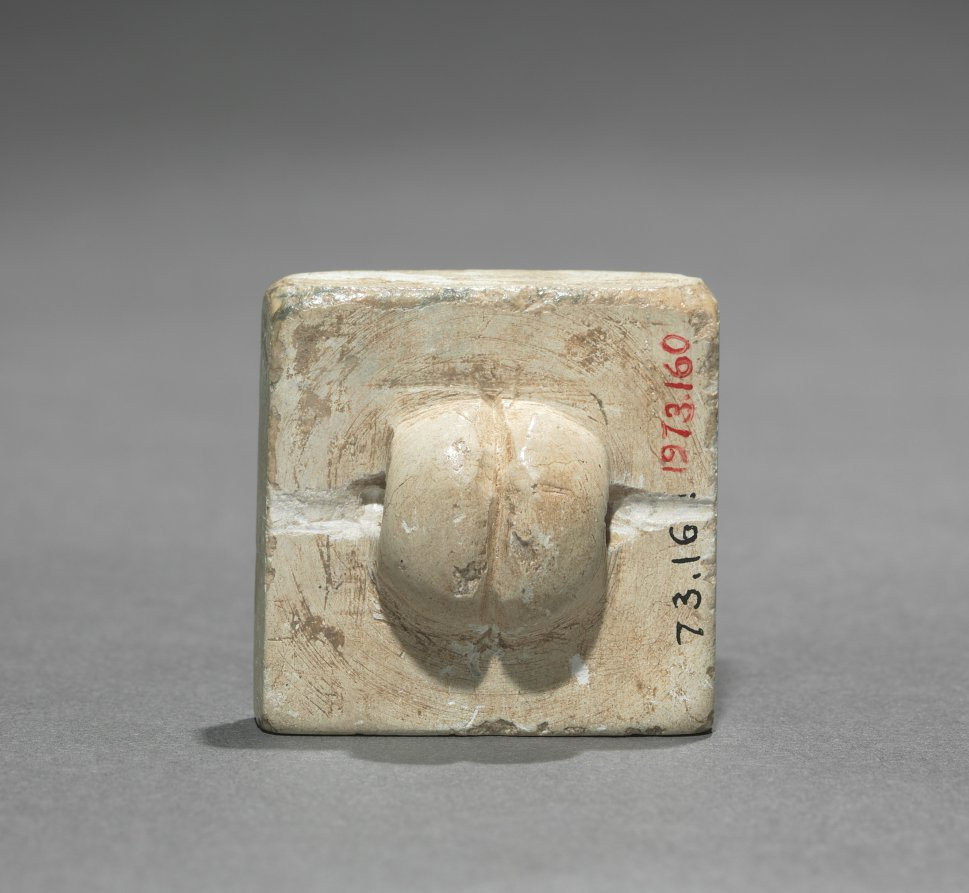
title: Seal with Two-Horned Bull and Inscription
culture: Pakistan, Indus Valley civilization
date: c. 2000 BCE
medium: steatite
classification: Seals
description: Small stone seals, probably used to identify merchandise or property, are among the most numerous objects discovered from the mysterious proto-historic sites along the banks of the Indus River system. Like these, most have sensitively rendered animal imagery along with an inscription written in a script that has not yet been deciphered.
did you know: A perforated boss at the back allowed the seal to be suspended and easily pressed.